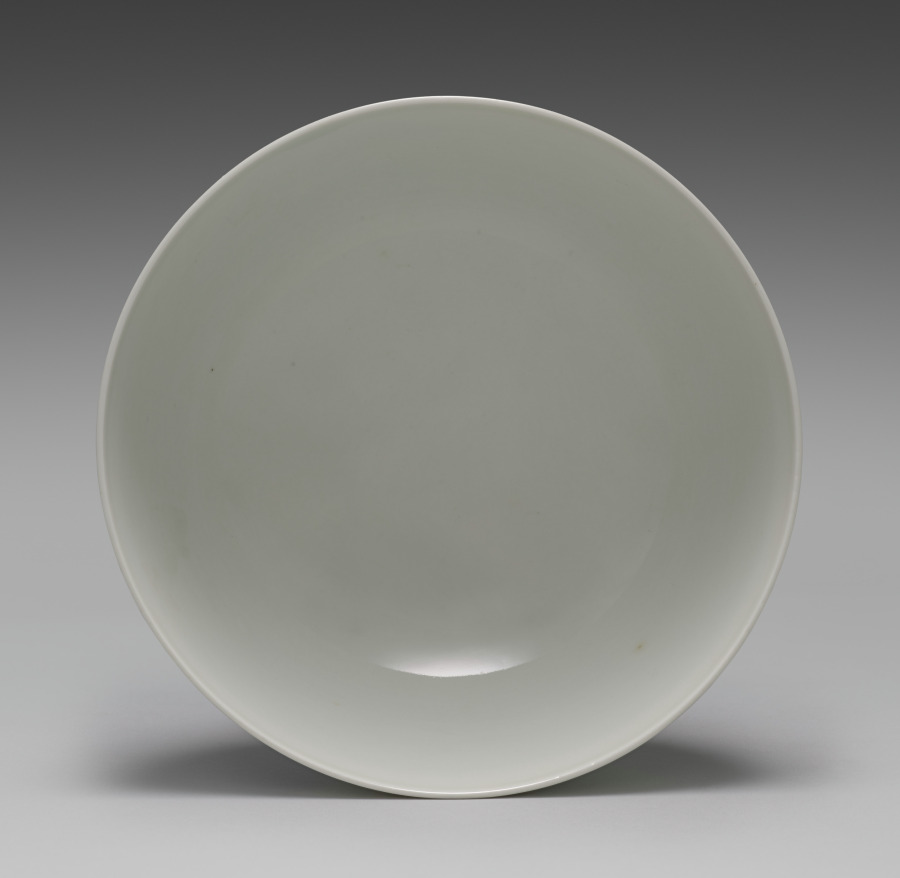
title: Bowl with Pines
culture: Japan, Meiji period (1868–1912)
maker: Seifū Yohei III (Japanese, 1851–1914)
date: 1893–1914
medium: porcelain with underglaze blue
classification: Ceramic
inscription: Inscription by Seifū Yohei IV on the box states that the bowl is the work of Yohei III.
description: The bowl has slightly more detailed surface designs painted in blue under the glaze than some other Yohei III's other teaware, like the Water Cooler with Pines, CMA 2022.163. The three pines, with two, three, and four racks of boughs respectively, have more angular rather than curved trunks, with clearly articulated bark.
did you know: The box for the bowl carries an attestation by Yohei IV that it is the work of his predecessor.